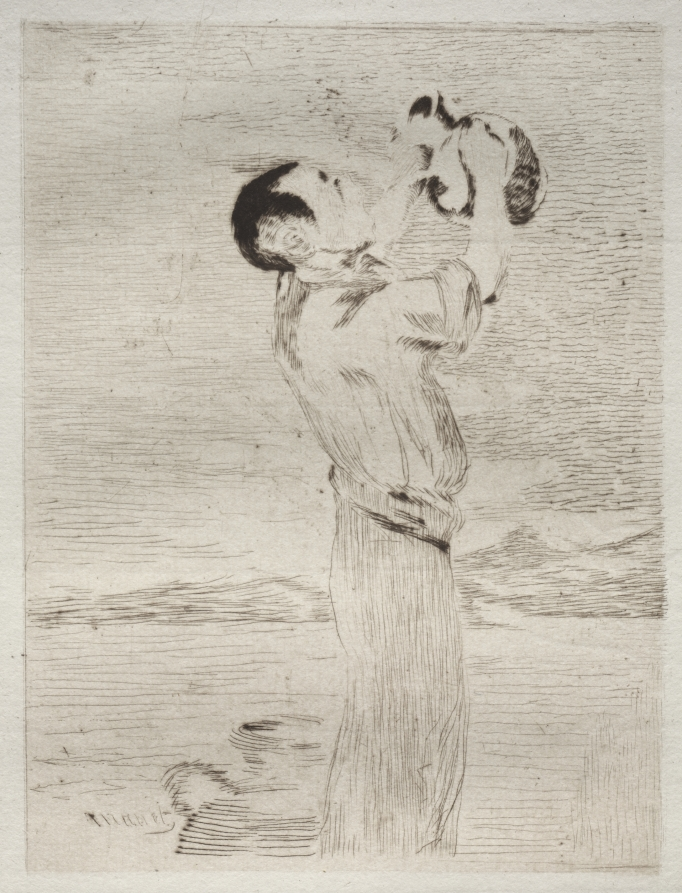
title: The Water Drinker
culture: France, 19th century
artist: Édouard Manet (French, 1832–1883)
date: c. 1865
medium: drypoint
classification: Print